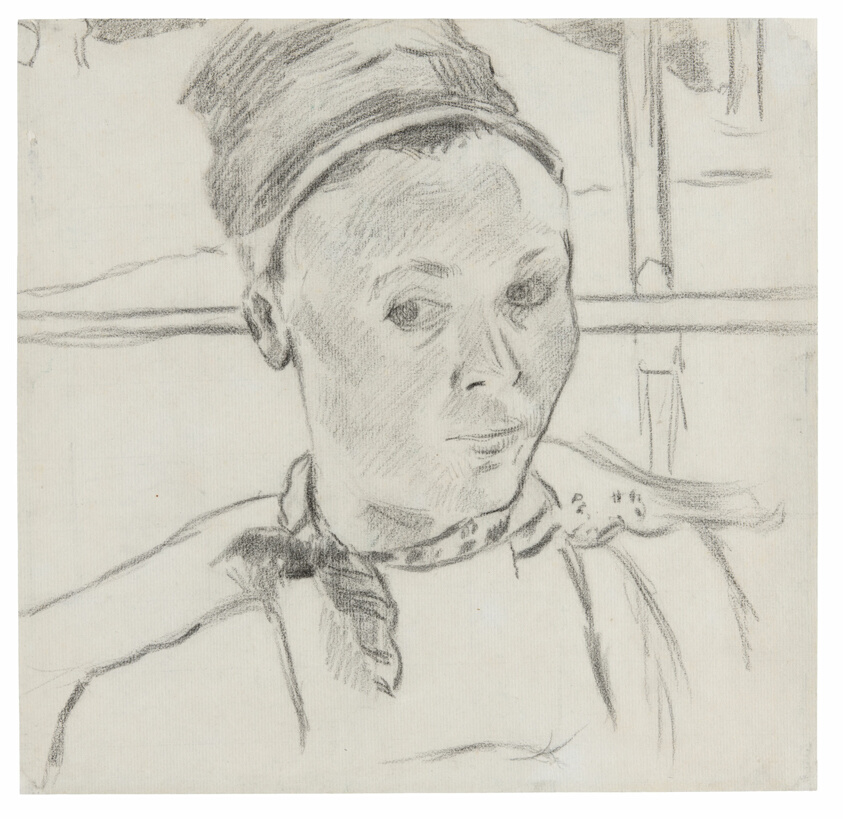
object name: Drawing and Watercolor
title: Bust of a Young Breton Woman (Possibly Marie Lagadu)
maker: Paul Gauguin (French, 1848-1903)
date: 1886/88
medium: Black fabricated chalk on ivory laid paper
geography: France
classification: charcoal; drawings (visual works); prints and drawing